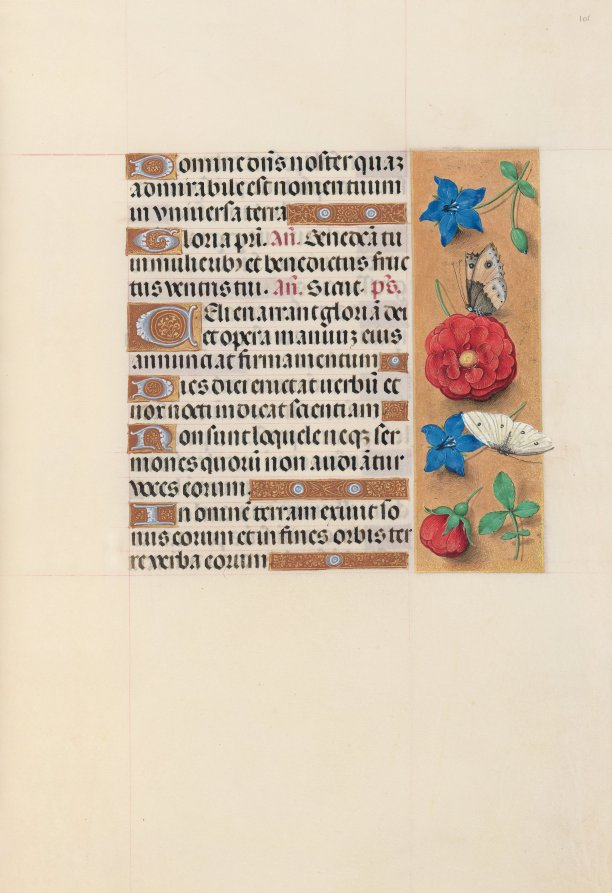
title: Hours of Queen Isabella the Catholic, Queen of Spain: Fol. 101r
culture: Flanders, Ghent and Bruges, late 15th century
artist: Master of the First Prayerbook of Maximillian (Flemish, c. 1444–1519)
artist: and Associates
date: c. 1500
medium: ink, tempera, and gold on vellum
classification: Bound Volume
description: This manuscript was illuminated by a circle of at least five highly organized manuscript painters active in the Flemish cities of Ghent and Bruges. The principal illuminator was Alexander Bening, who painted the majority of the book's miniatures. Manuscripts produced by this circle of artists are renowned for the decoration of their borders, which typically feature a rich variety of realistically-painted flowers, birds, and butterflies. This prayer book, called a book of hours, was intended not for a cleric, but for the private devotions of a lay person-in this case, Isabella the Catholic, Queen of Spain (1451-1504). Isabella's coat of arms embellishes the book's frontispiece. It is unlikely that the book was commissioned by the Queen herself; rather, she probably received it as a diplomatic gift from someone courting her patronage, perhaps Cardinal Francisco Jimenez de Cisneros. A Franciscan friar, Jimenez was dependent upon Isabella for his advancement, first to the post of Queen's confessor in 1492, and then to Archbishop of Toledo in 1495.